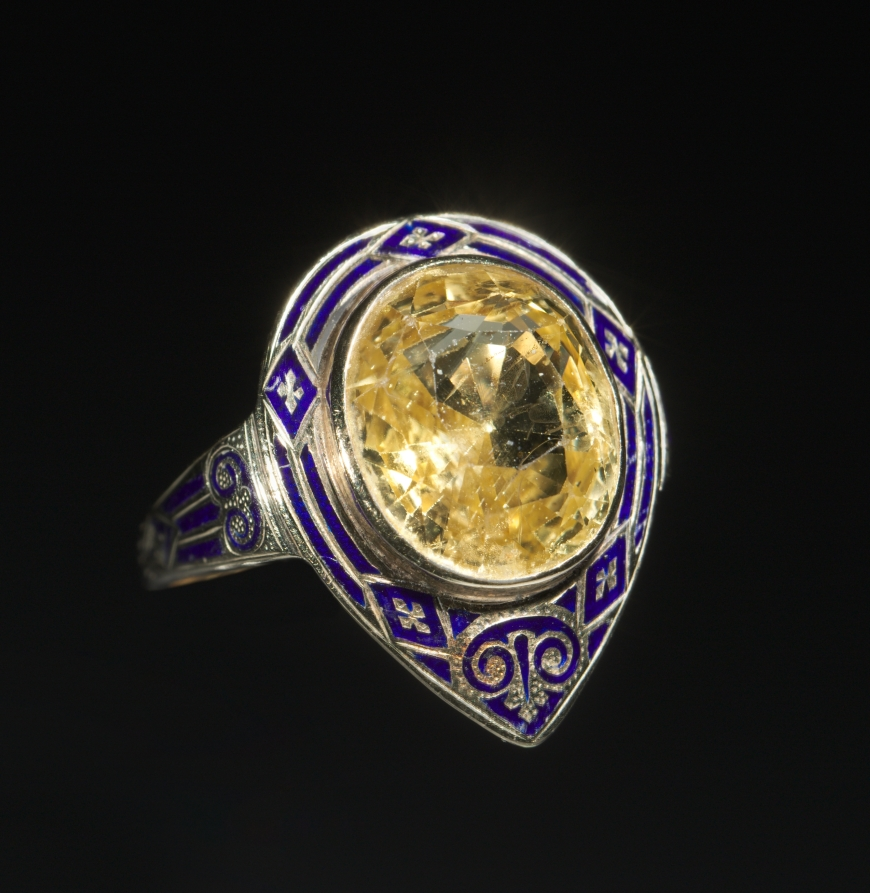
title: Ring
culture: America, Ohio, Cleveland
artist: Potter and Mellen, Inc. (American)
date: c. 1910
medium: enamel, gold, yellow stone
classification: Jewelry